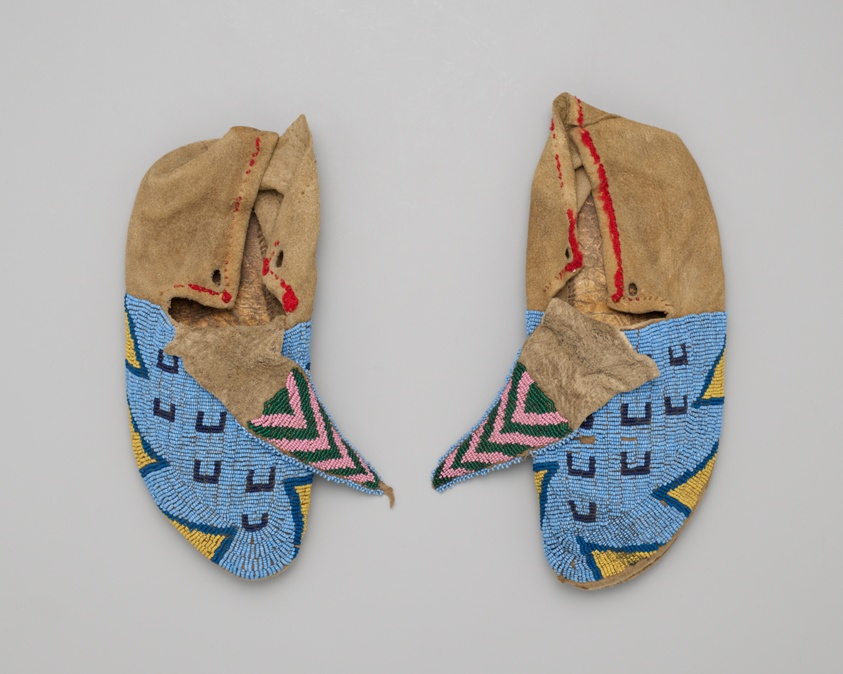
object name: Costume and Accessories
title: Man's Moccasins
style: arapaho, plains indian, native american, americas, Arts of the Americas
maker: Artist unknown (possibly Arapaho, Hinono’ei); Central Plains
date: 1885-90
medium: Leather, red yarn, and glass beads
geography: Central Plains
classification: beadwork; costume; art of the americas